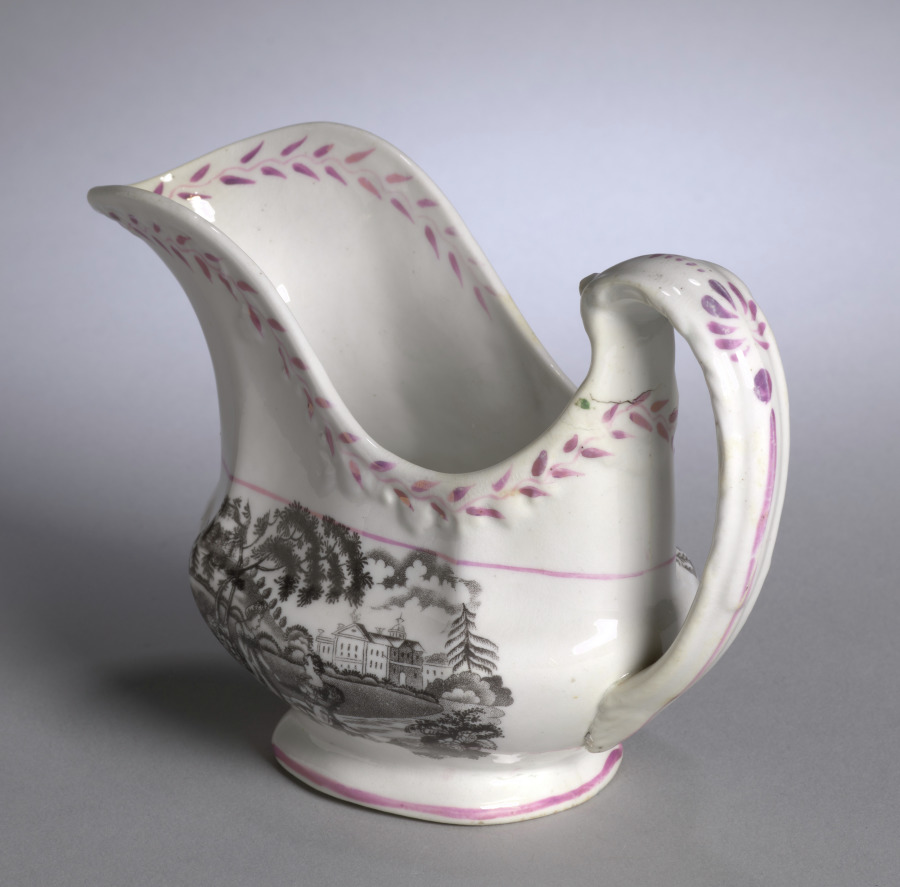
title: Cream Pitcher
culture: England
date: c. 1800–1825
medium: earthenware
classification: Ceramic